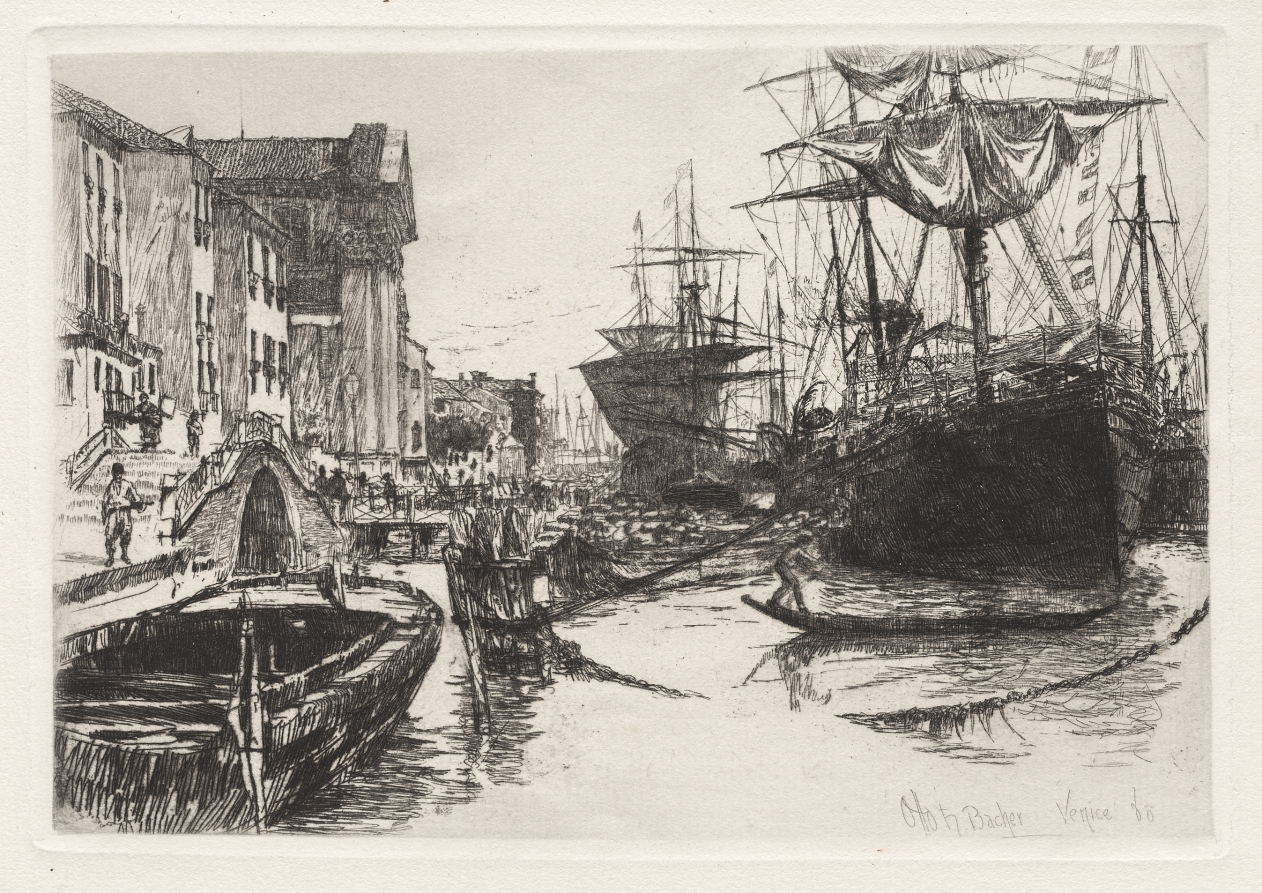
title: Venice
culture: America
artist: Otto H. Bacher (American, 1856–1909)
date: 1880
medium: etching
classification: Print